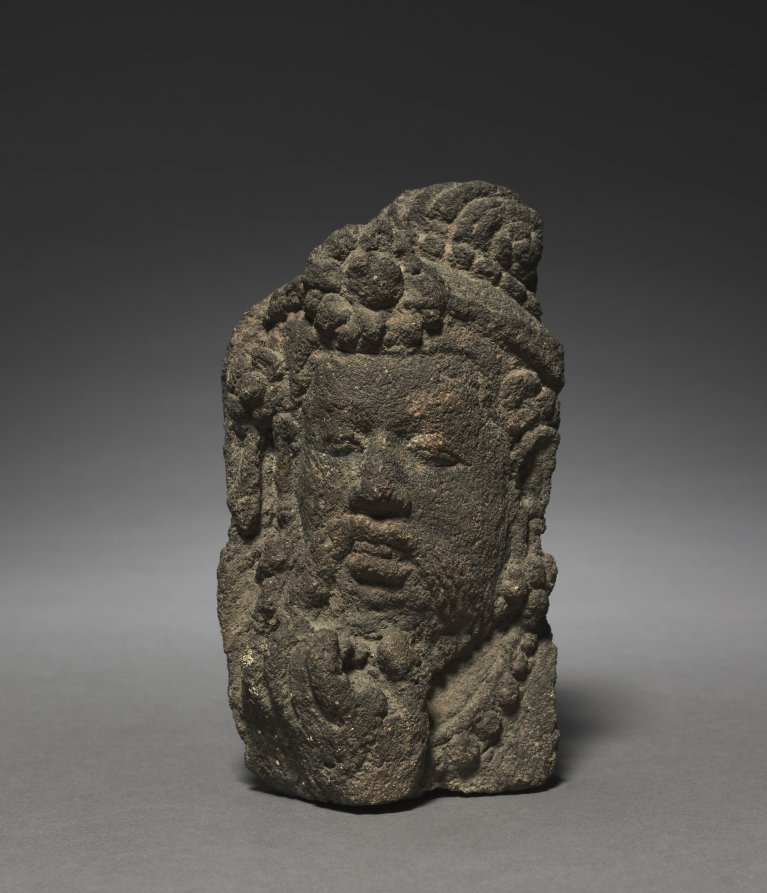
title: Head of a "Bearded Man"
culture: Central Java, Borobudur, c. 9th Century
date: c. 800s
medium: lava stone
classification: Sculpture